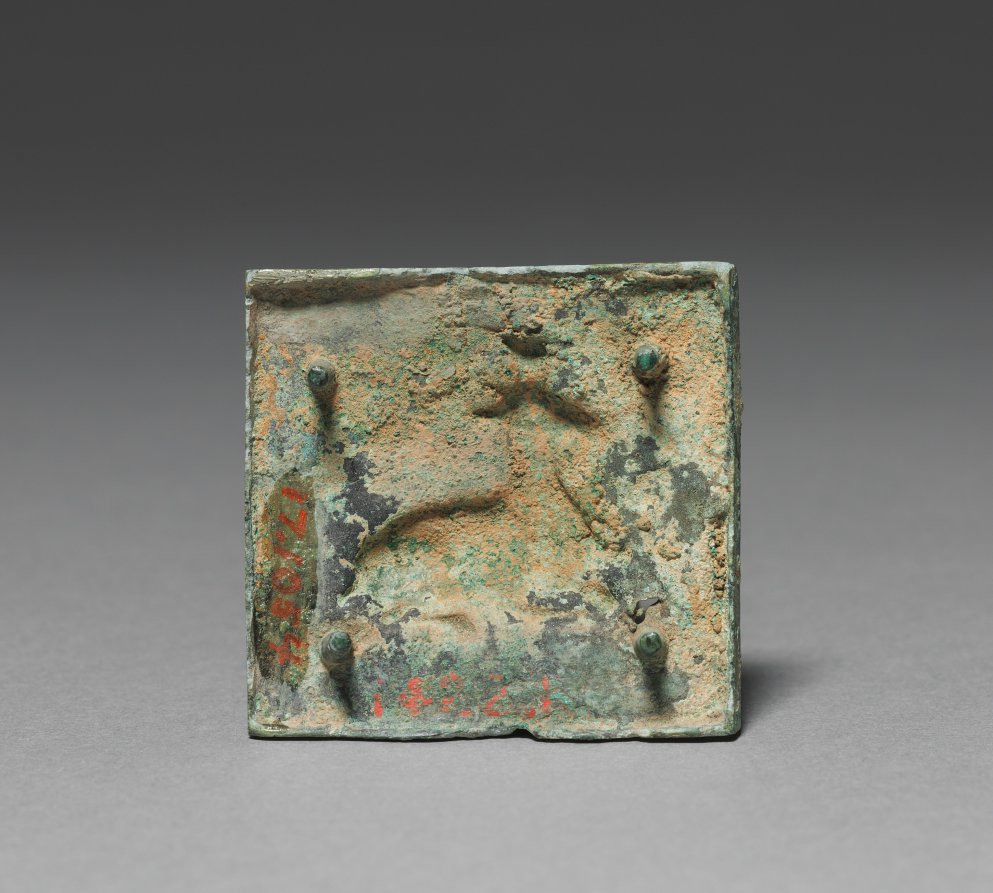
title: Belt Ornament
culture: Korea, Goryeo dynasty (918–1392)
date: 1100s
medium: gilt bronze with repoussé relief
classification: Metalwork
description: Metallurgy advanced remarkably in the Goryeo period (918-1392), explaining why a large quantity of sophisticated metal artifacts with delicate designs were used not only as daily accessories but also as burial goods. Belt ornaments like this example were fixed to leather belts. Surround by intricate arabesque patterns, a seated dear was done in the repoussé technique. Such animal motifs were widely shared among Eastern Eurasian tribes, from where the first settlers in the Korean peninsula originated.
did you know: The Japanese antique dealer Yamanaka & Company, which opened its branches in New York (1895) and Boston (1899), sold small Korean archaeological materials such as this belt ornament to American collectors in the early 20th century.